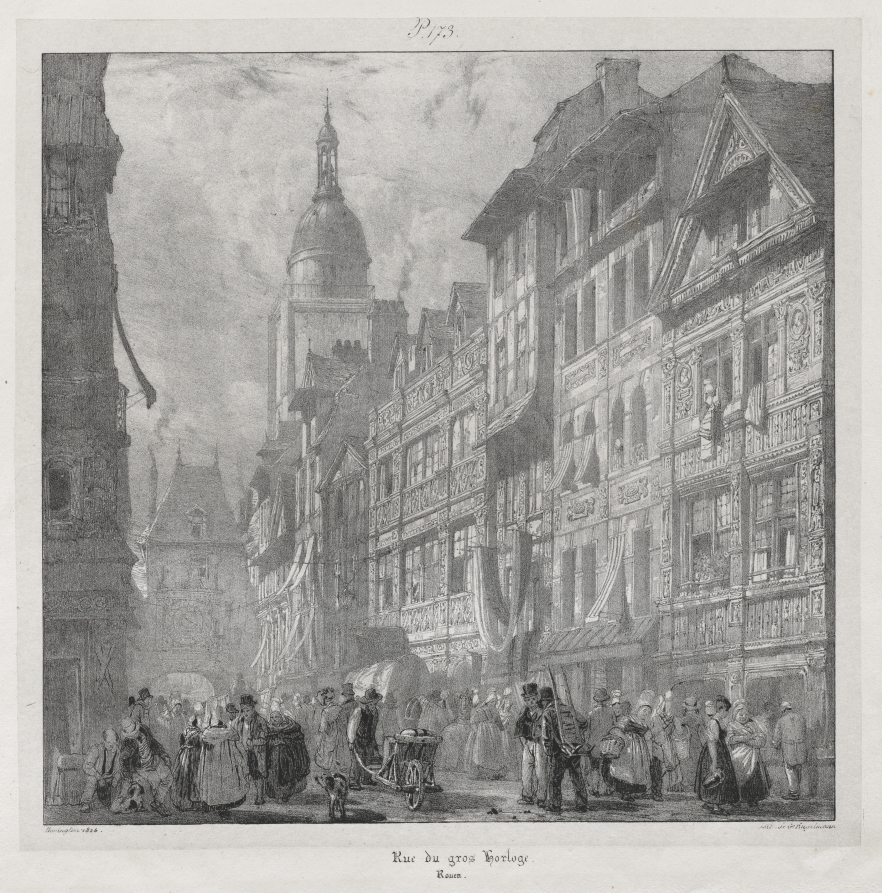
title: Voyages pittoresques et romantiques dans l'ancienne France, Normandie: Rue du Gros Horloge, Rouen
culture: England, 19th century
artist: Richard Parkes Bonington (British, 1802–1828)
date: 1824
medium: lithograph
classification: Print